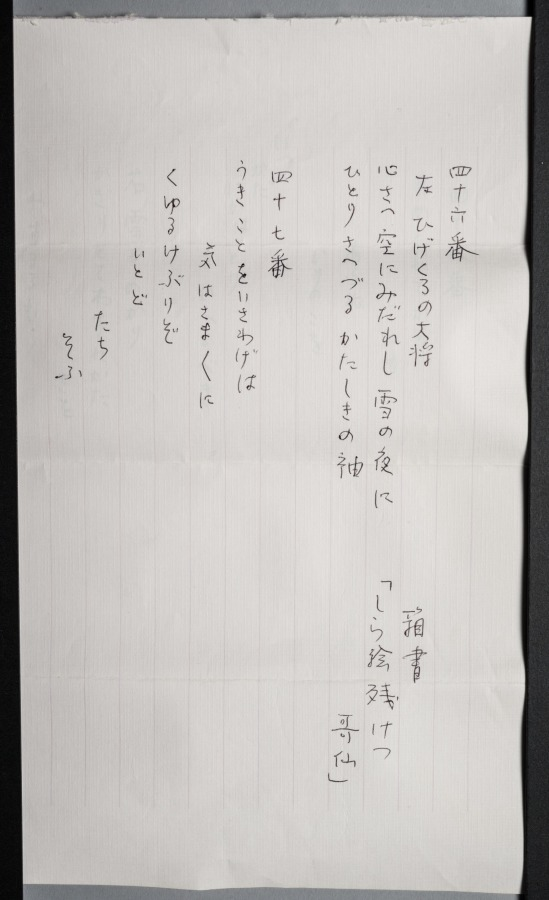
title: Section of an Illustrated Tale of Genji Poetry Contest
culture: Japan, Muromachi period (1392–1573)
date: 1400s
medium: section of a handscroll mounted as a hanging scroll; ink on paper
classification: Painting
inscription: 四十六番 左 ひげくろの大将 心さえ空にみだれし雪の［も」夜に ひとりさえつるかたしきの袖／ 四十七番 うきことを思ひさわ げばさまざまに くゆるけむりぞ いとど たち そふ／ 四十八番 すがくれてかず にも あらぬ かりのこを いづかたにかはとりかくすべき／ 右 雲井のかり かぎりとてわすれがたきを わするるも こや世に なびくこころな るらむ／ あさきなを いひ ながしける かわ ぐちは いかが もらしし せきのあらがき／ あわれをもいかに しりてか なぐさ めむ あるや 恋しき なきや かなしきに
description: This hanging scroll was once part of a handscroll depicting a waka (thirty-one syllable verse) poetry contest between characters from the 11th-century literary classic Tale of Genji. In this section, a woman known informally as Kumoi no kari, or “Goose in Fog,” after a lovelorn line she hums in the novel, is pitted against Higekuro no taishō, or “General Blackbeard.” Three of his poems, numbered 46 to 48, from “The Handsome Pillar” chapter appear over his image. The subsequent three poems inscribed above Kumoi no kari are presented as her “responses,” and come from "The Plum Tree Branch", “New Wisteria Leaves”, and "Evening Mist" chapters.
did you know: General Blackbeard laments having smelly ash poured upon him by his angry wife in one of the poems.